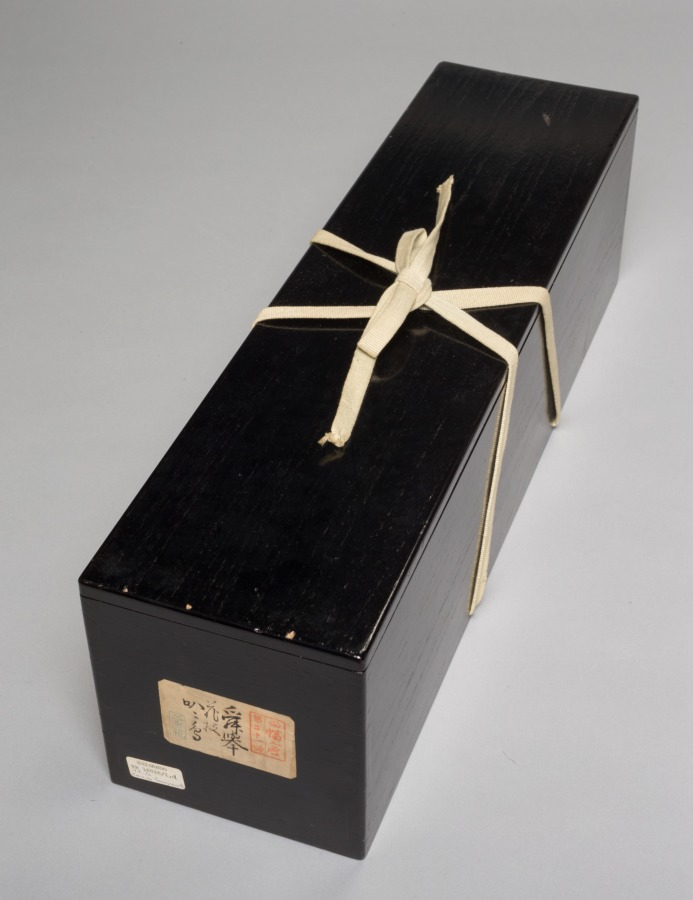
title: Crow on a Pomegranate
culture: Japan, Muromachi period (1392–1573)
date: 1500s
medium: hanging scroll; ink on paper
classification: Painting